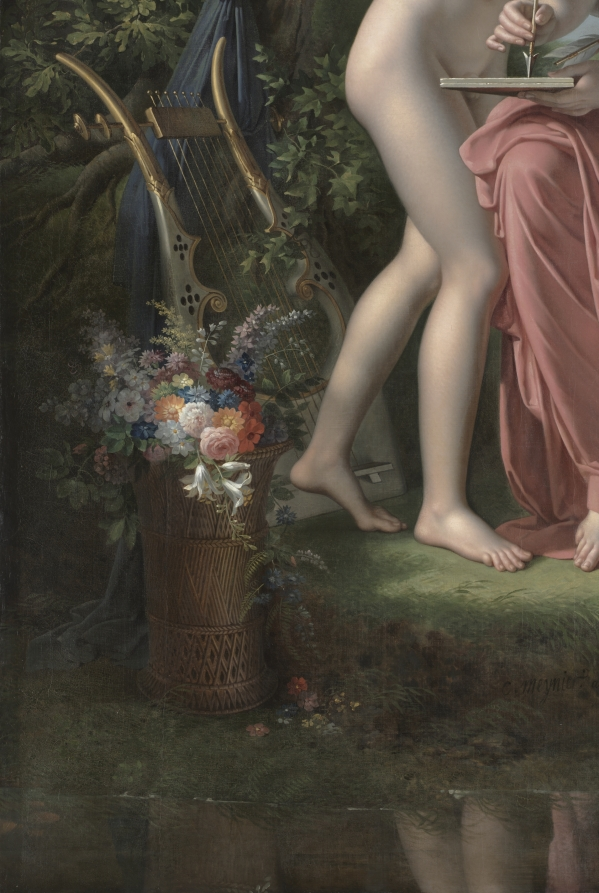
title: Erato, Muse of Lyrical Poetry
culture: France, late 18th-early 19th century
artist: Charles Meynier (French, 1768–1832)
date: 1800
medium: oil on canvas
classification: Painting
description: Erato, the muse of lyric and erotic poetry, is often depicted with a golden arrow received from Eros or Cupid, a sign of the emotion that inspires her.